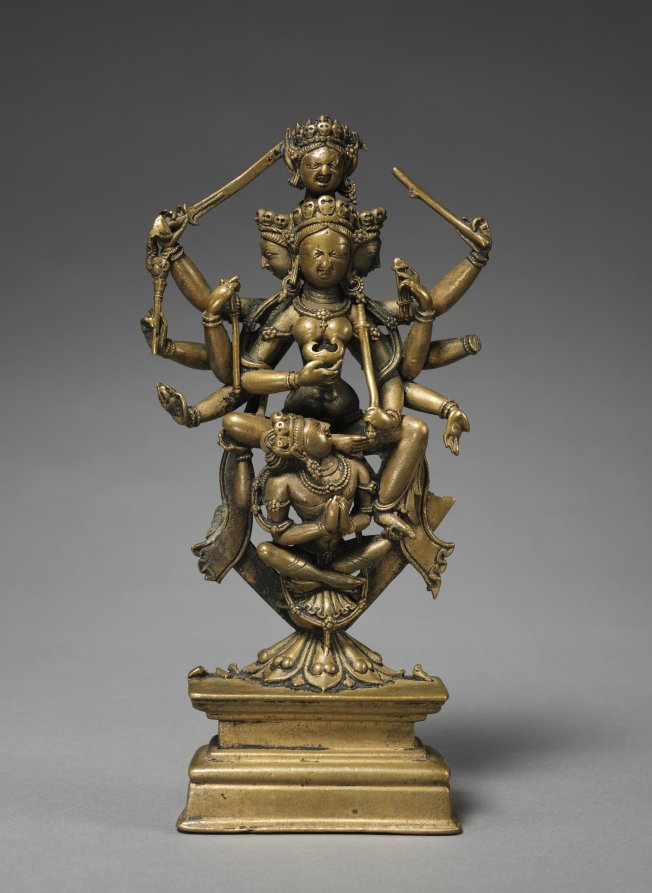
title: Goddess Siddhalakshmi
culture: India, Kashmir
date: 1000s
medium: bronze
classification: Sculpture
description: This specific goddess with five heads and ten arms is described in Hindu ritual handbooks from Kashmir. She is white in color and "rests on a lotus and Shiva." Her left hands hold, from top to bottom: an elephant goad, manuscript, noose (broken), the gift-giving gesture, and a hatchet. In her right hands are a sword, trident, skull staff, skull cup, and the gesture of protection. These objects reveal the awe-inspiring extent of her knowledge, skill, and power to defeat enemies on behalf of her devotees.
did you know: In tantric texts, this goddess is described as white.